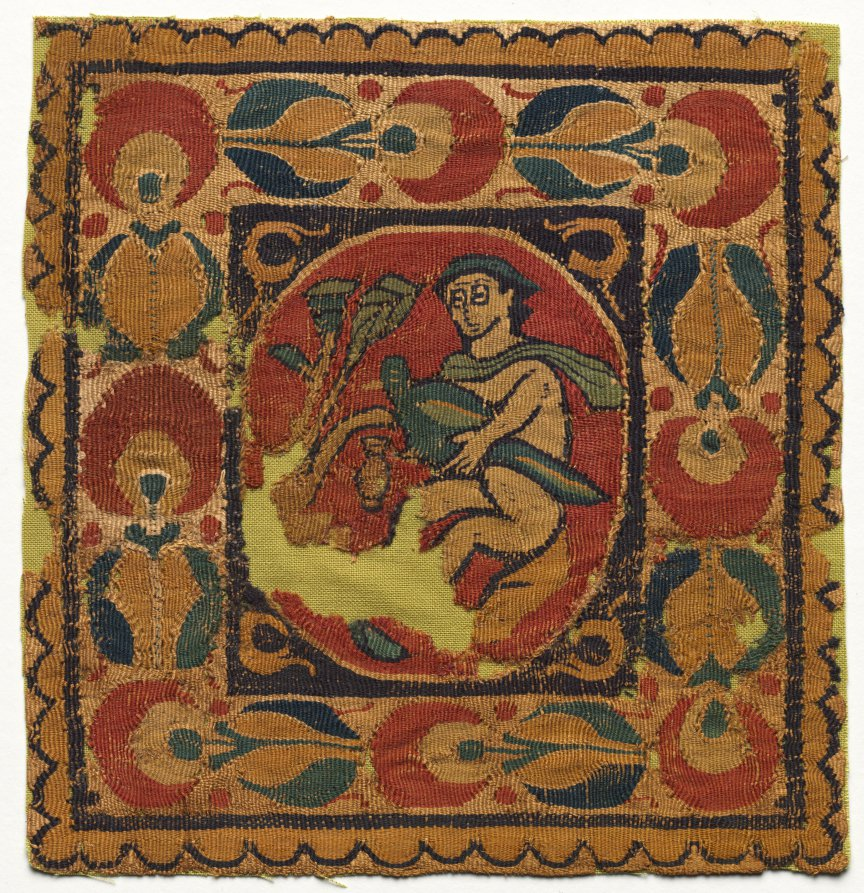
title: Square Segmentum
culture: Egypt, Byzantine period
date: 400s ?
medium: tapestry; linen and wool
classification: Textile